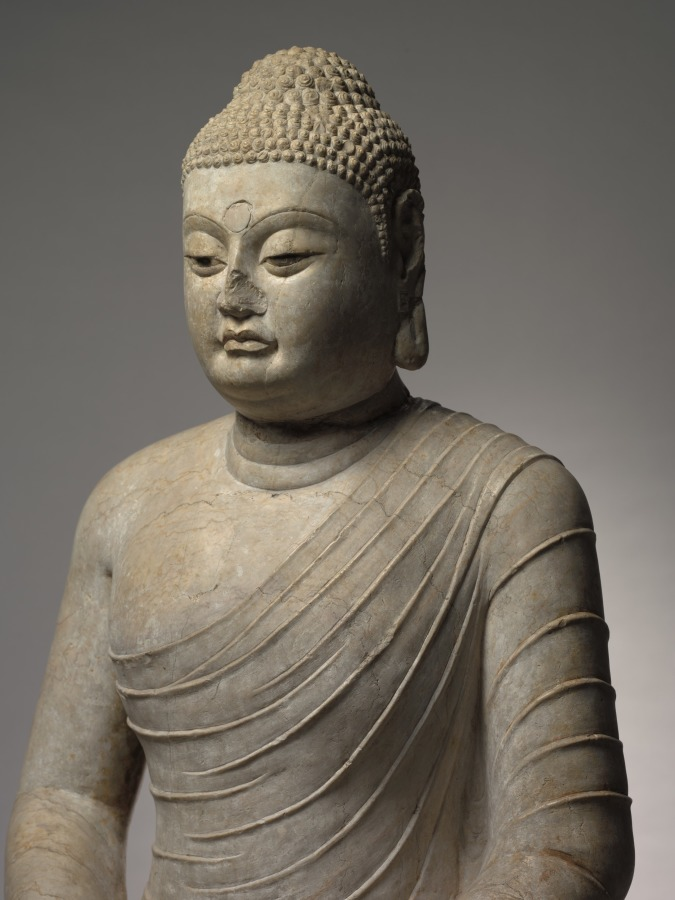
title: Seated Amitayus Buddha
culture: China, Northern Qi dynasty (550-577)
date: c. 570s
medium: marble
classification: Sculpture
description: Amitayus, the Buddha of Infinite Life, is seated in meditation on a double lotus pedestal. The pedestal was not made with the statue but the combination is faithful to the original artistic conception. The statue is an extremely rare example of a major type of Northern Qi Buddhist sculpture. The heavy, massive front highlights the sense of monumentality and the spiritual essence of the Buddha. Today the sculpture is united with a pedestal that exhibits the rich, ornate style of early Tang sculpture. It was commissioned by the Duke of Liang, Fang Xuanling (578–648), for the blessing of his second son and daughter-in-law, the Tang imperial princess of Gaoyang. The iconography and inscription suggest that it originally went with a statue, now missing, of Shakyamuni, the historical Buddha, instead of Amitayus.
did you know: The stringlike folds of the Buddha's draperies emphasize his monumental, rigidly erect torso and tubular limbs.